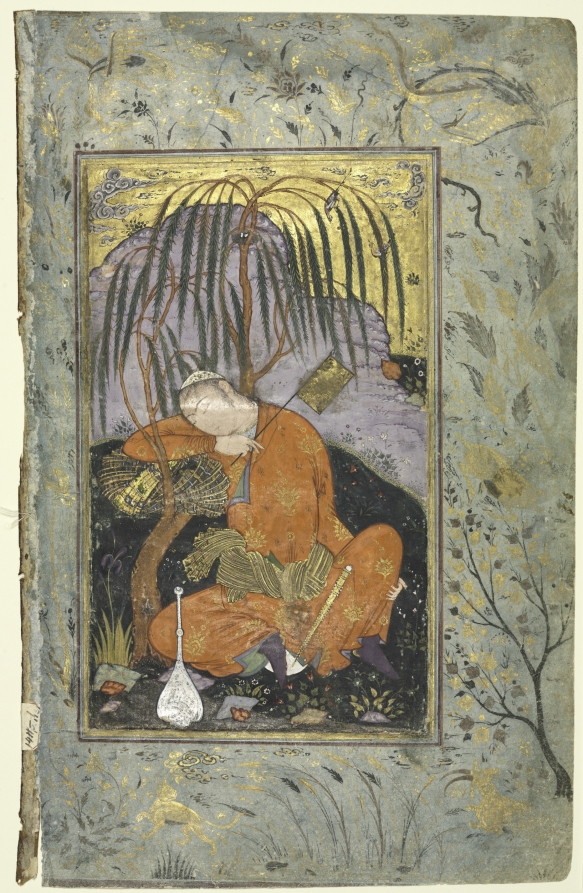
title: Sleeping Youth (verso), Illustration from a Single Page Manuscript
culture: Iran, Isfahan, Safavid period (1501-1722)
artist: style of Riza-yi Abbasi (Iranian)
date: early 1600s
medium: opaque watercolor and gold on paper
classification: Manuscript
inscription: script: none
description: The Iranian painter Riza ‘Abbasi spearheaded the new style with single figures, receding space, and partial modeling, influenced by European travelers to Iran and painters who accompanied foreign embassies, one being John the Dutchman who in 1626 painted narrative scenes on palace walls of Shah ‘Abbas I. This sleeping youth displays a prestigious sash and has removed his equally opulent turban.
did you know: Paintings like this frequently illustrated collections of verses about love and beauty; these themes often appear to serve as allegories of things divine.